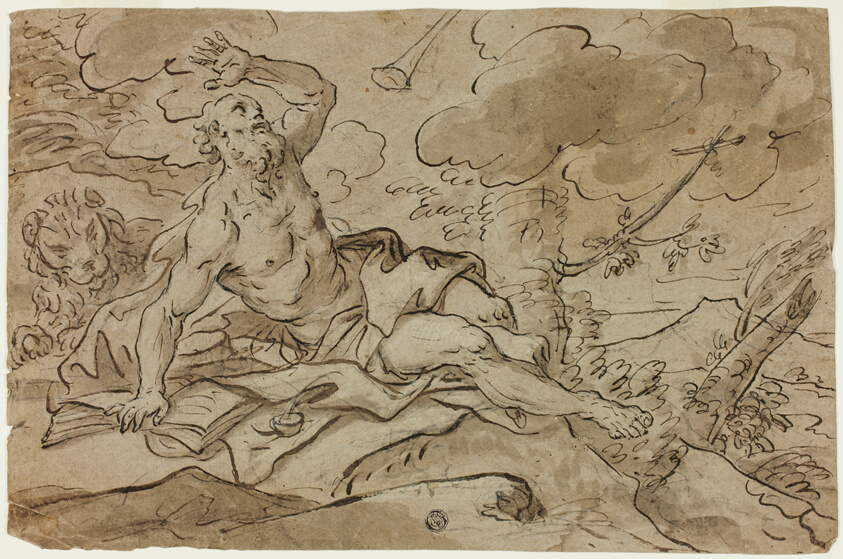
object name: Drawing and Watercolor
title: Saint Jerome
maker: Paolo de Matteis (Italian, 1662-c. 1728)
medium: Pen and brown ink, with brush and brown wash, over black chalk on brown laid paper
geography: Italy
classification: pen and ink drawings; drawings (visual works); prints and drawing